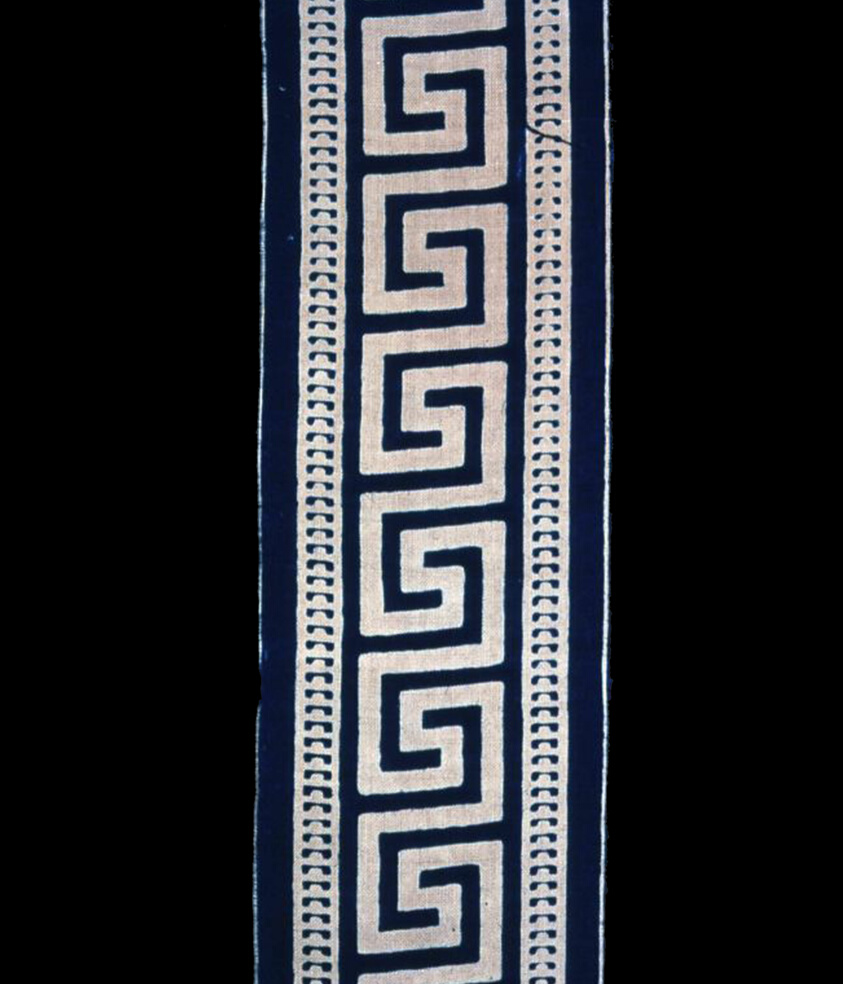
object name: Textile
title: Border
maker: England or United States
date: 19th century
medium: Cotton, plain weave; block printed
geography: England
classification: textile; weaving - printed